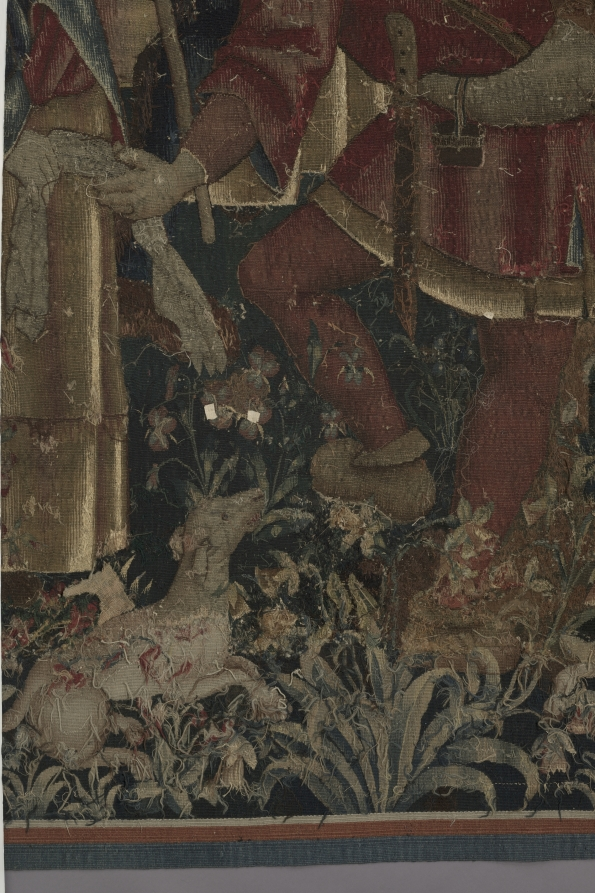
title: Shepherds in a Round Dance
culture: Netherlands, early 16th century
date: around 1500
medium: Wool and silk: tapestry weave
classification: Tapestry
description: Late medieval tapestries often use a limited yet contrasting color palette to portray stylized images. The expressions of these figures, for example, are conveyed more by their postures than by their faces. Four shepherds and shepherdesses join hands and dance to the music of a bagpiper at the far right, while a lord and two ladies on the left look on. A dog and sheep amid blossoming plants and trees contribute to the festive pastoral scene in front of a castle.